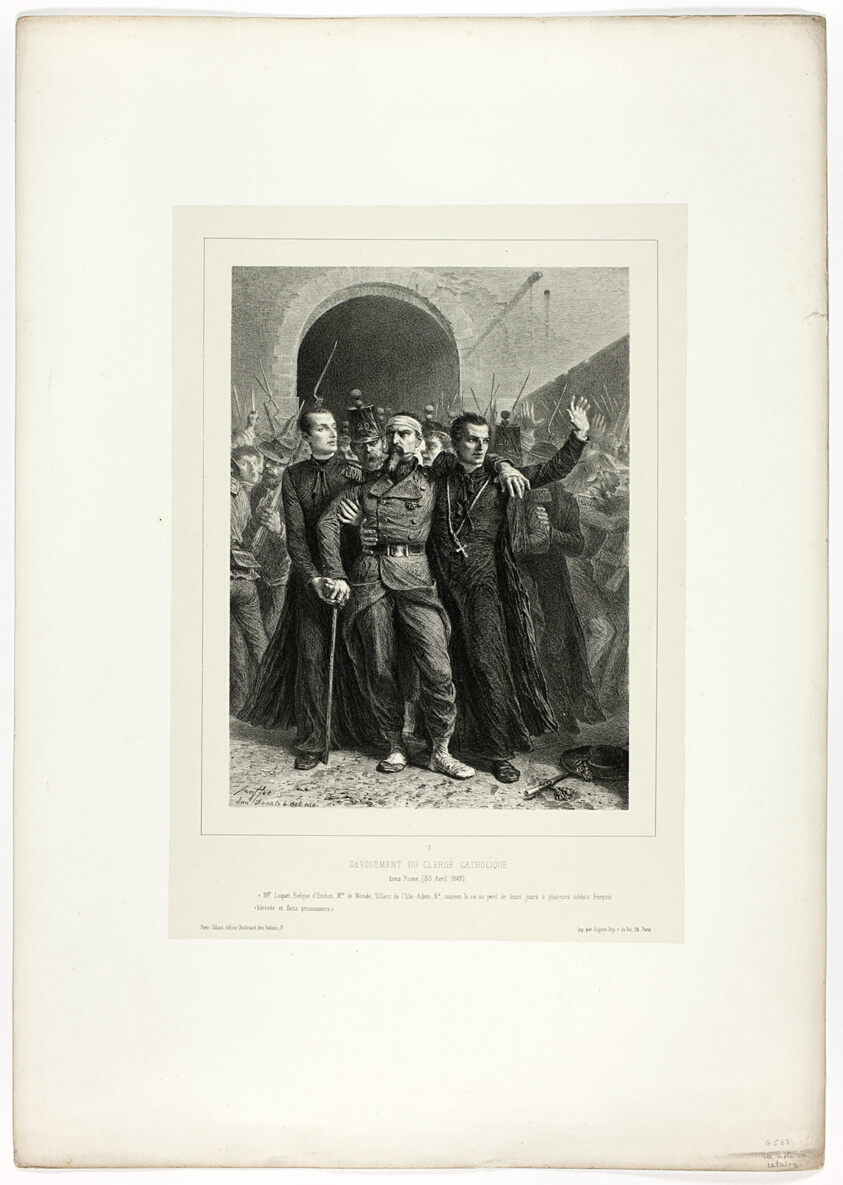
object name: Print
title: Devotion of the Catholic clergy in Rome, April 30, 1849, from Souvenirs d’Italie: Expédition de Rome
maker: Denis Auguste Marie Raffet (French, 1804-1860); printed by Auguste Bry (French, 19th century); published by Chez Gihaut Frères (French, 19th century)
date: 1858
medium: Lithograph in black on buff wove paper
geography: France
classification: lithograph; print; prints and drawing